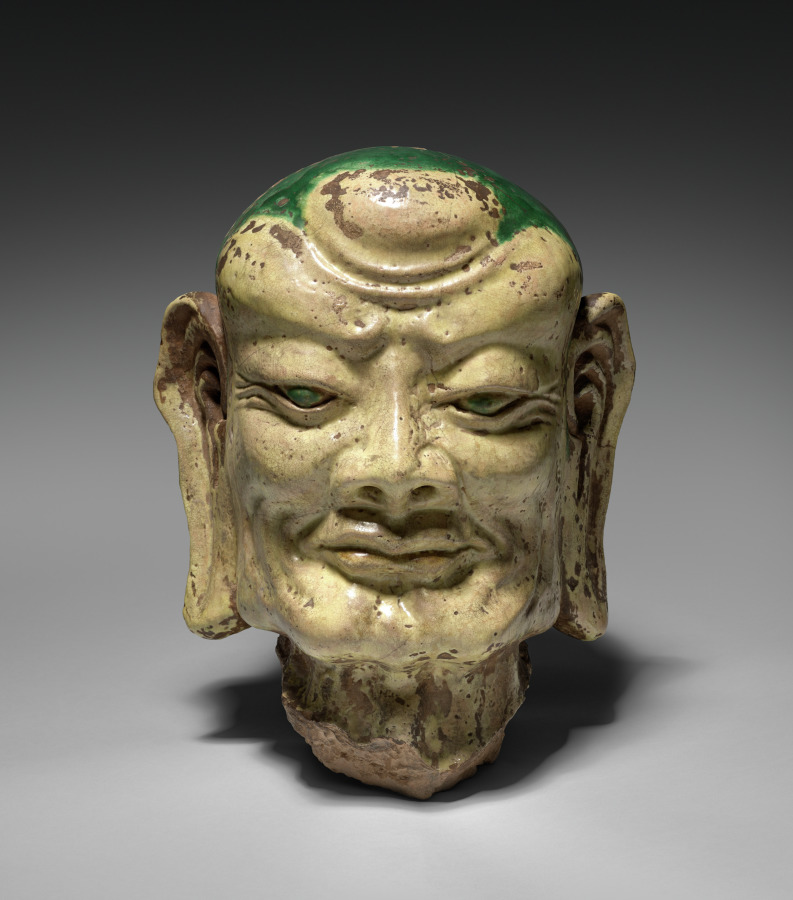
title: Head of a Lohan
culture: China, Ming dynasty (1368–1644)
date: 1368–1644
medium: earthenware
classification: Sculpture